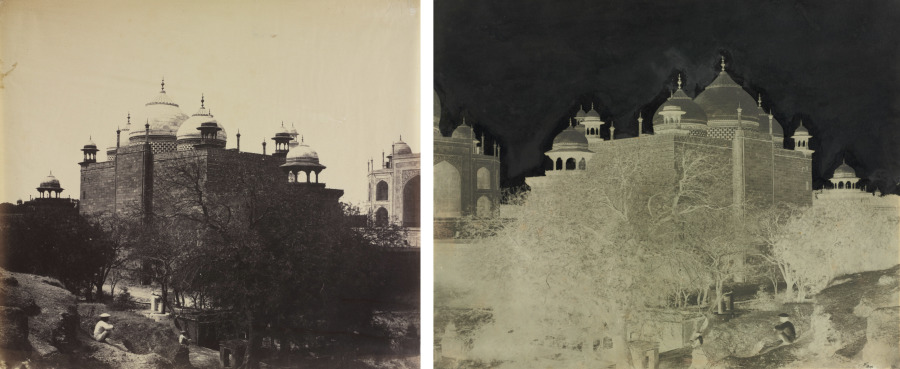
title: Taj Mahal, Back View of the Rest-House, with Figure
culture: England, 19th century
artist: Dr. John Murray (Scottish, 1809–1898)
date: c. 1858–1862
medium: wax paper negative and albumen print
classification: Photograph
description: Although Dr. John Murray enjoyed a distinguished medical career as a surgeon, administrator, and leader in the fight against cholera, he is now best known for his superb paper negative photographs of India. Having lived near the Taj Mahal in the city of Agra for 20 years, Dr. Murray took great interest in the monument, photographing it from numerous perspectives and under varying light conditions. In this print, he chose an elevated viewpoint to compose an intriguing rendering of the Rest-House. The paper negative was waxed before sensitizing, improving its translucency and allowing the photographer to render his architectural subject matter in broad areas of light and dark, emphasizing the building's bold geometric forms. The surrounding, picturesque landscape adds both visual interest and complexity to the composition. Seated figures in the foreground provide an indication of scale and the sense of wonder that might be experienced in the presence of this vast monument.